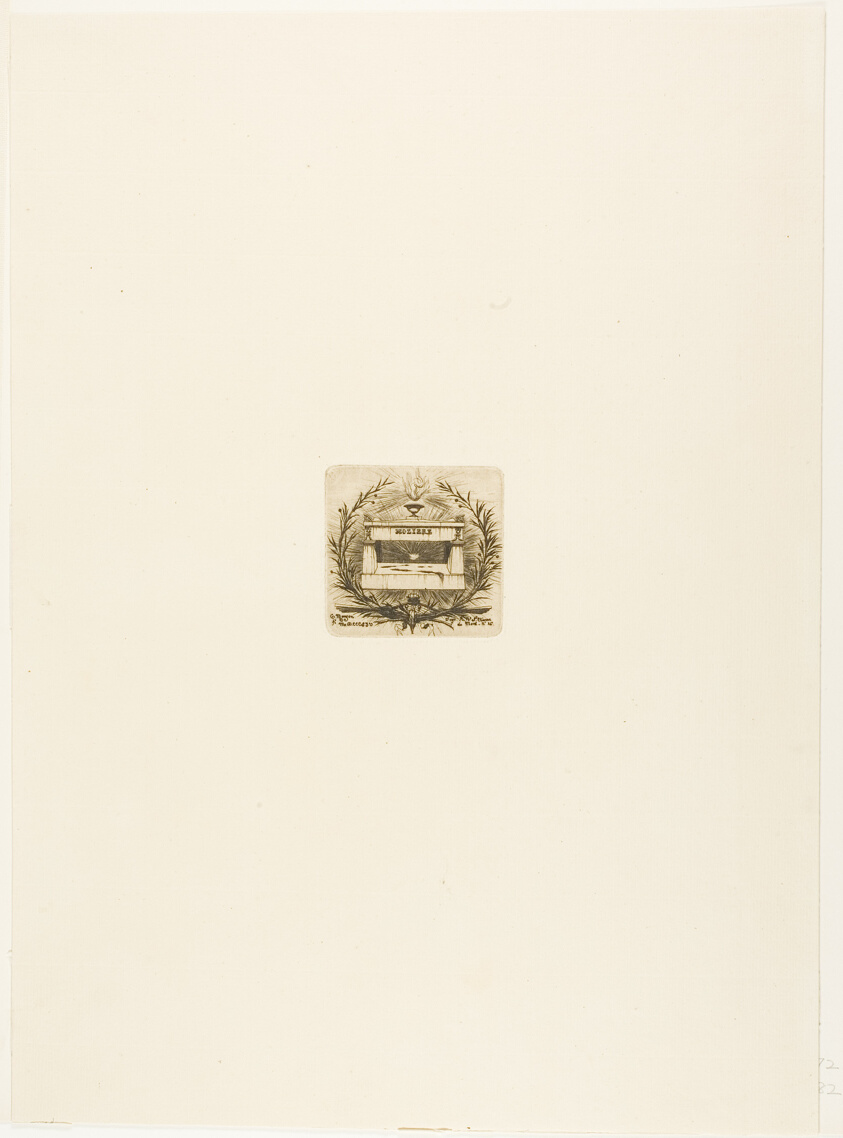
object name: Print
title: Molière's Tomb, Père-Lachaise Cemetery, Paris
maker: Charles Meryon (French, 1821-1868)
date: 1854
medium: Etching in warm black on ivory laid paper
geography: France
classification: etching; print; prints and drawing